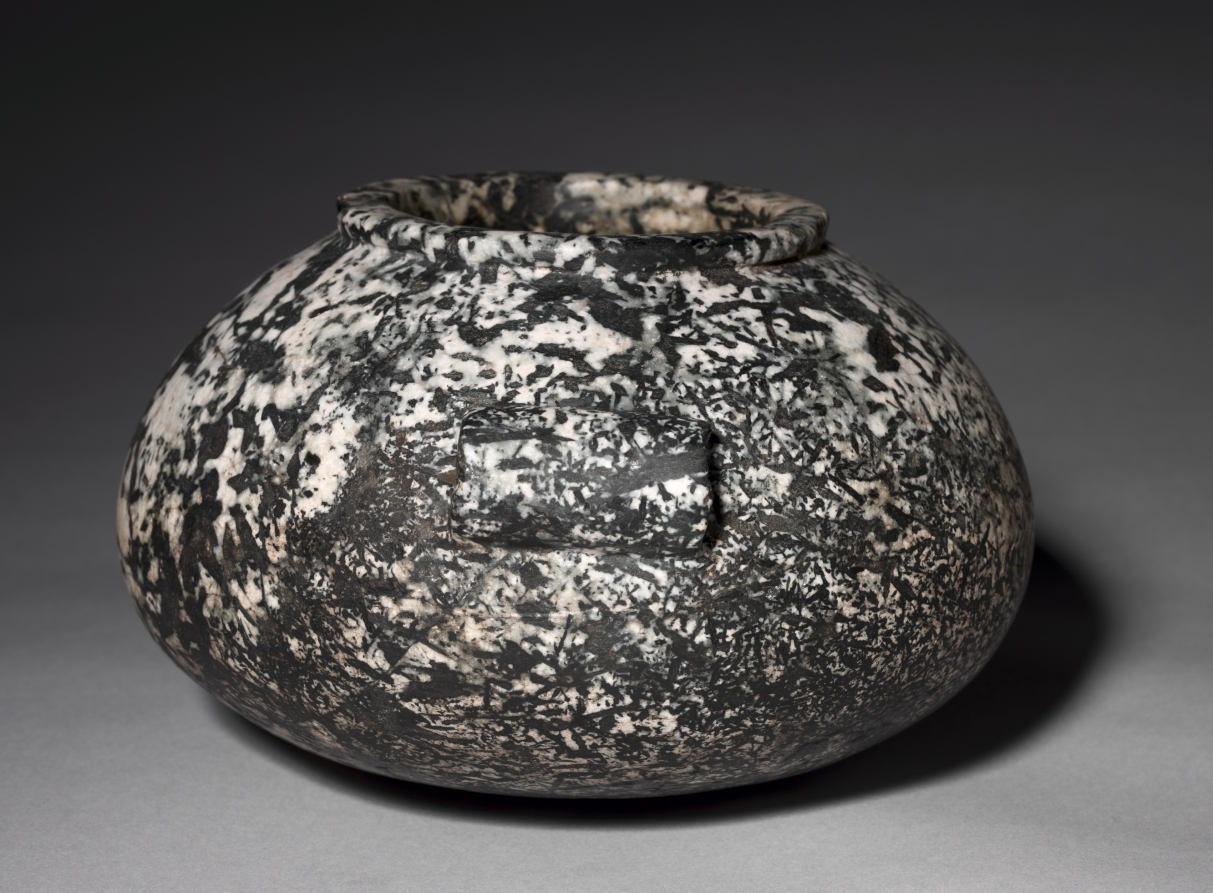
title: Squat Jar with Lug Handles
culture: Egypt, Early Dynastic (2950–2647 BCE), Dynasties 1–3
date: 2950–2573 BCE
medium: pegmatitic hornblende diorite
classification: Vessels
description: A single tomb might contain hundreds of stone vessels replicating the shapes of pottery vessels used in everyday life. The most popular material for stone vessels was white or banded travertine (Egyptian alabaster), found close to the Nile, but prospectors and quarrymen often traveled far in search of the desired materials. The hard stone hornblende diorite, notable for its mottled texture, was quarried in the desert along the route to the Red Sea.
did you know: The stone used for this vessel, a pegmatitic hornblende diorite whose white crystals contain a faint tint of pink, indicates it must have been considered a luxury item.